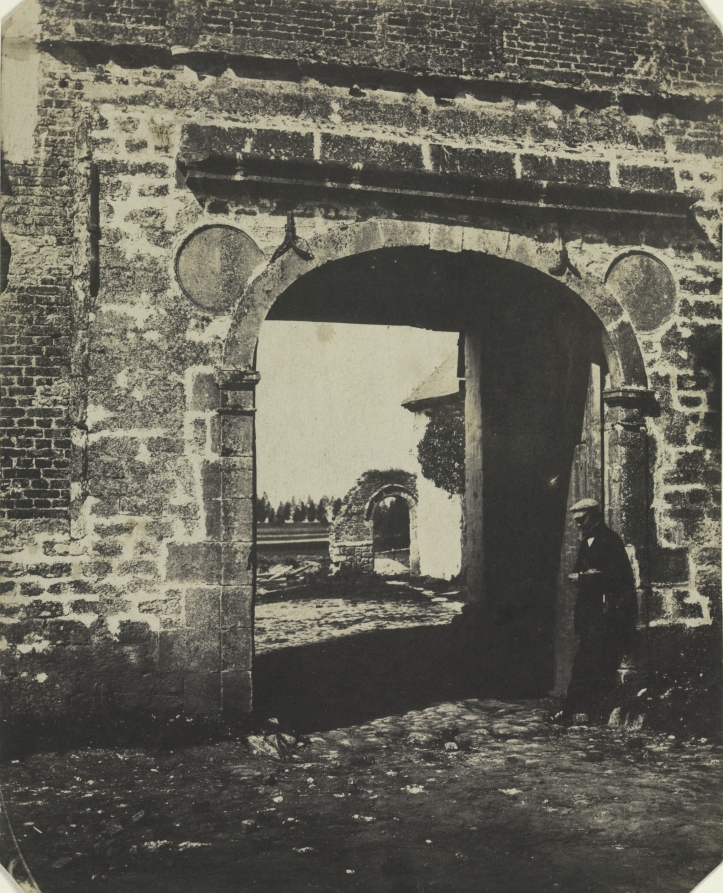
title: Arch in Farmyard, Swansea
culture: England, 19th century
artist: Calvert Richard Jones (British, 1804–1877)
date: 1845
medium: salted paper print from calotype negative, gold-toned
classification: Photograph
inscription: Written in pencil on verso: "10726-CIWS"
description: Educated as a mathematician, musician, and clergyman, Jones was an accomplished daguerreotypist before he was introduced to the calotype by William Henry Fox Talbot in 1845. Jones's pictures were taken primarily in Wales, England, Ireland, and the Mediterranean and often depicted complex compositions of ruins, landscape, and rustic architecture. To provide a sense of scale and human presence, he almost always included figures in his architectural views (here a lone individual leans against the archway). In this photograph Jones also alluded to the inevitable passage of time by contrasting the monumental arch in the foreground with the ruined arch in the distance.